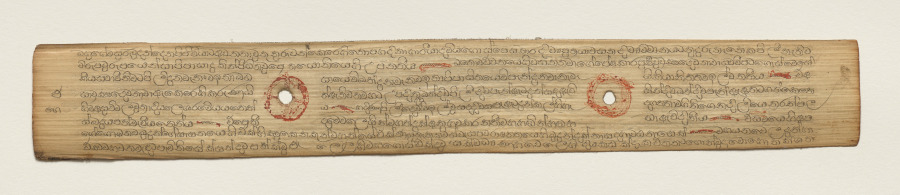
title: Leaf from a Buddhist Manuscript (recto)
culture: Sri Lanka, Singhalese, Late 17th century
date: c. 1700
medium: fiber paper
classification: Manuscript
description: Palm leaf material is still used for manuscripts in Sri Lanka. The palm leaves are prepared first by boiling them, drying them in the sun, and then rubbing them with oils. Scribes then use a metal stylus to incise the text. Then charcoal powder is wiped across the pages, filling in only the inscribed lines.